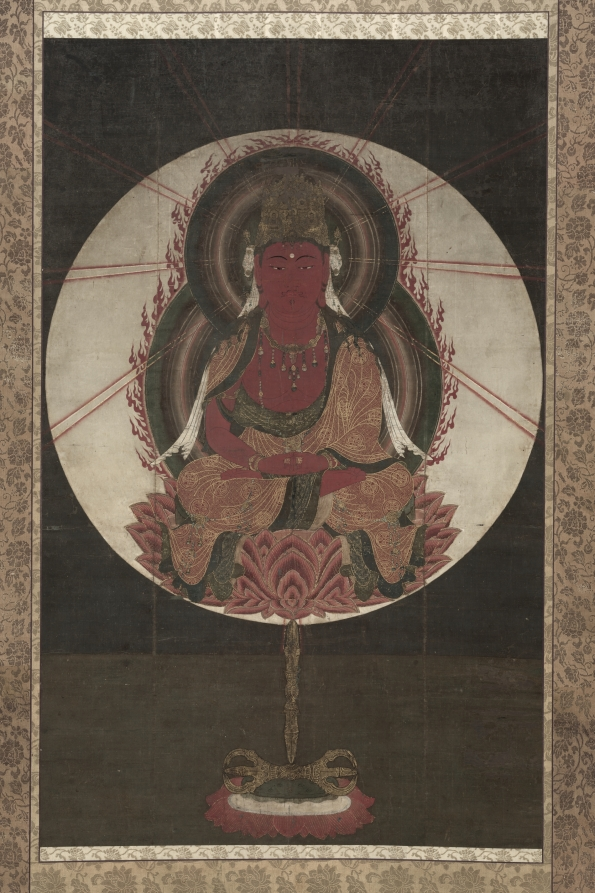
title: Red Amida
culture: Japan, Kamakura period (1185–1333)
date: 1300s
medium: hanging scroll; ink, color, and gold on silk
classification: Painting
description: This rare image depicts the Crimson Crystal Buddha of Infinite Life, or Red Amida, with a red body; it is more common to see Red Amida with a red robe. His crown contains the Five Wisdom Buddhas who represent different aspects of wisdom. He is supported by a lotus flower with five- and single-pronged vajras, ritual implements derived from ancient Indian weapons. Their selection is particular to specific deities and rites and based on sacred texts.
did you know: Red Amida holds his hands in a mudra, or gesture, of welcome, as he receives worshipers to another plane called the Pure Land.